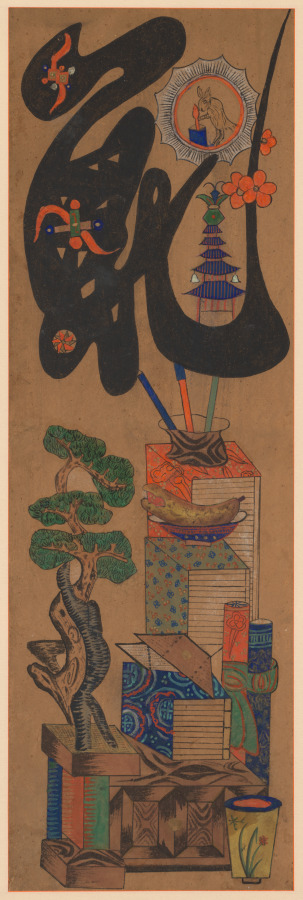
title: Munja-Chaekgeori Screen (Character-Books Screen)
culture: Korea, Joseon dynasty (1392–1910)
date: early 1900s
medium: Eight-panel folding screen, ink on paper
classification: Painting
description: This folding screen is a whimsical harmony of two different subjects: chaekgeori, or books and things; and munja, or characters. The lower section of each panel depicts the imagery of things, including books, decorative arts, and utilitarian objects. The upper portion of each panel bears a classical Chinese character. Read from far right to left, the eight characters refer to the values of Confucian teachings of the Joseon dynasty: filial piety, brotherly love, loyalty, trust, propriety, righteousness, modesty, and humility. While these two pictorial genres are harmoniously conjoined on the same picture plane, two sharply contrasting world views—urban consumerism and traditional Confucian ethics that despise materialism—compete with one another.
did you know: The eight Korean characters each mean filial piety, brotherly love, loyalty, trust, propriety, righteousness or justice, modesty or integrity, and humility or the feeling of shame.